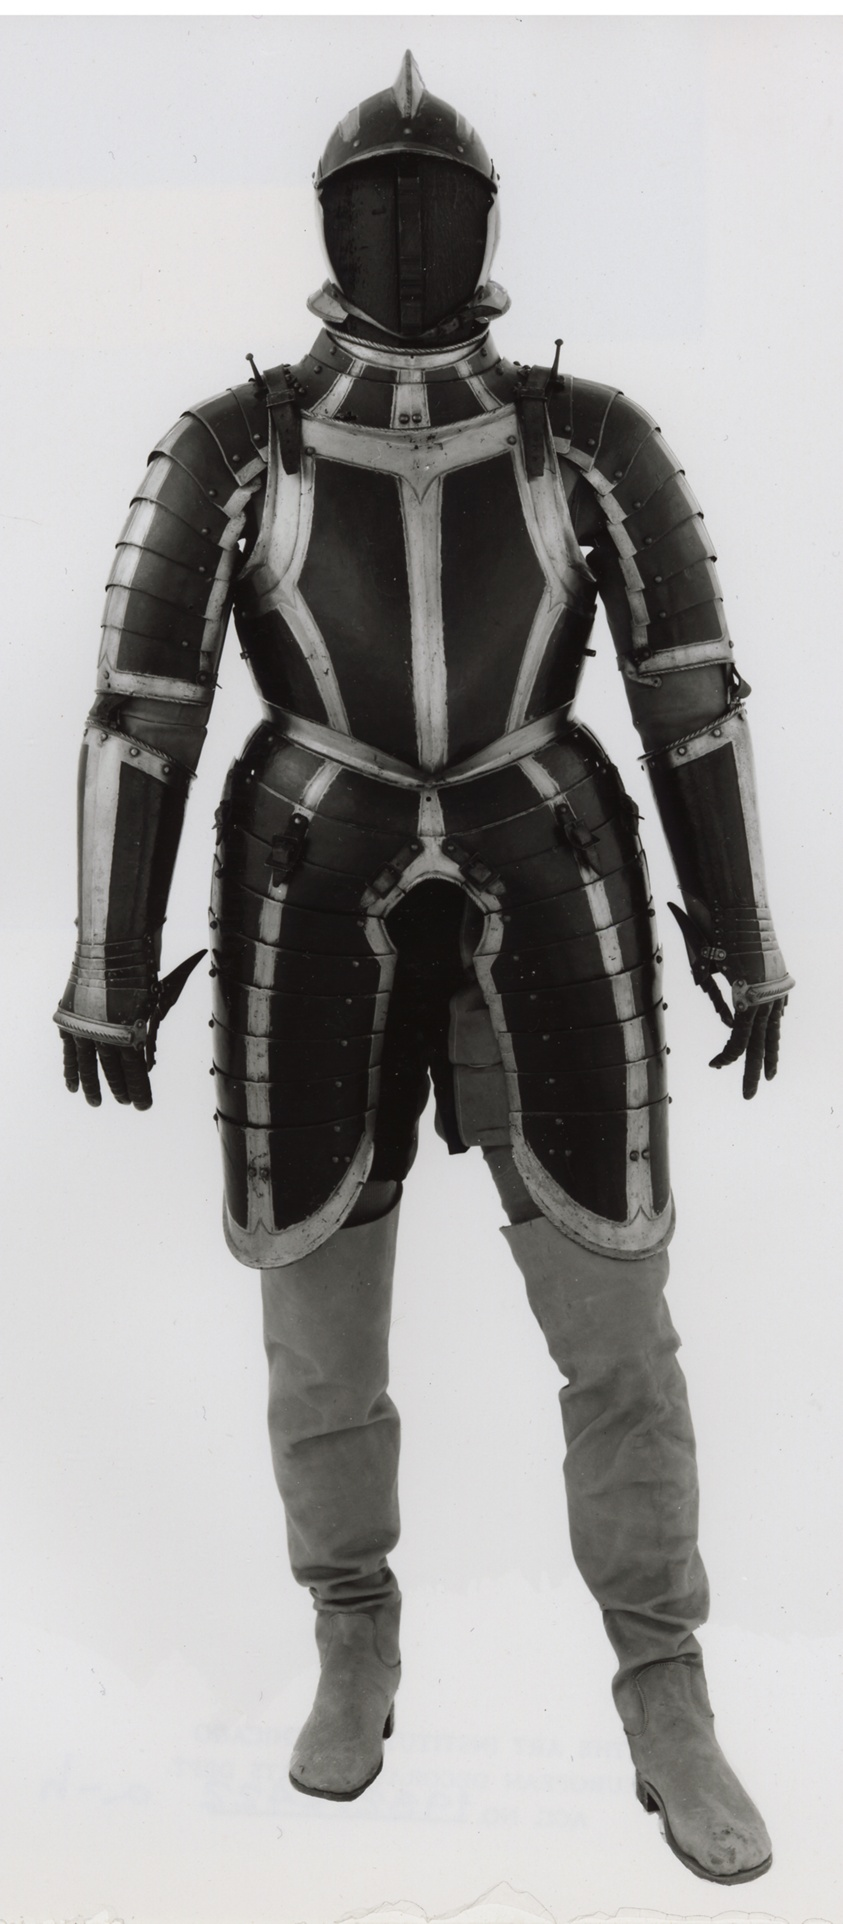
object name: Armor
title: Three-Quarter Composite Armor for the Infantry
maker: German, Nuremberg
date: c. 1575/85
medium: Steel and paint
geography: Nuremberg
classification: suit; armor; arms and armor